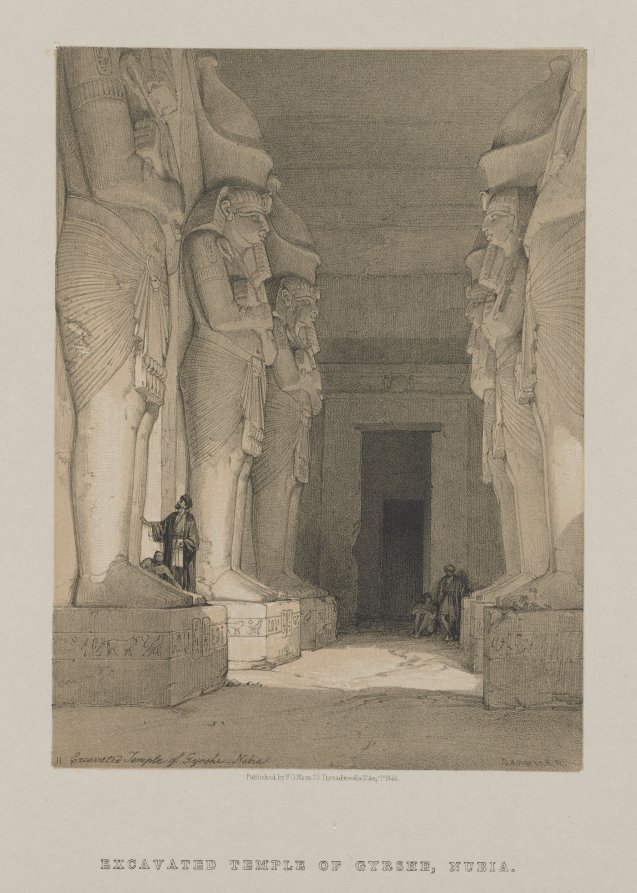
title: Egypt and Nubia, Volume I: Excavated Temple of Gyrshe, Nubia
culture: England, 19th century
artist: Louis Haghe (British, 1806–1885)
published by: F. G. Moon, 20 Threadneedle Street, London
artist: after David Roberts (Scottish, 1796–1864)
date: 1846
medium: color lithograph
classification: Print